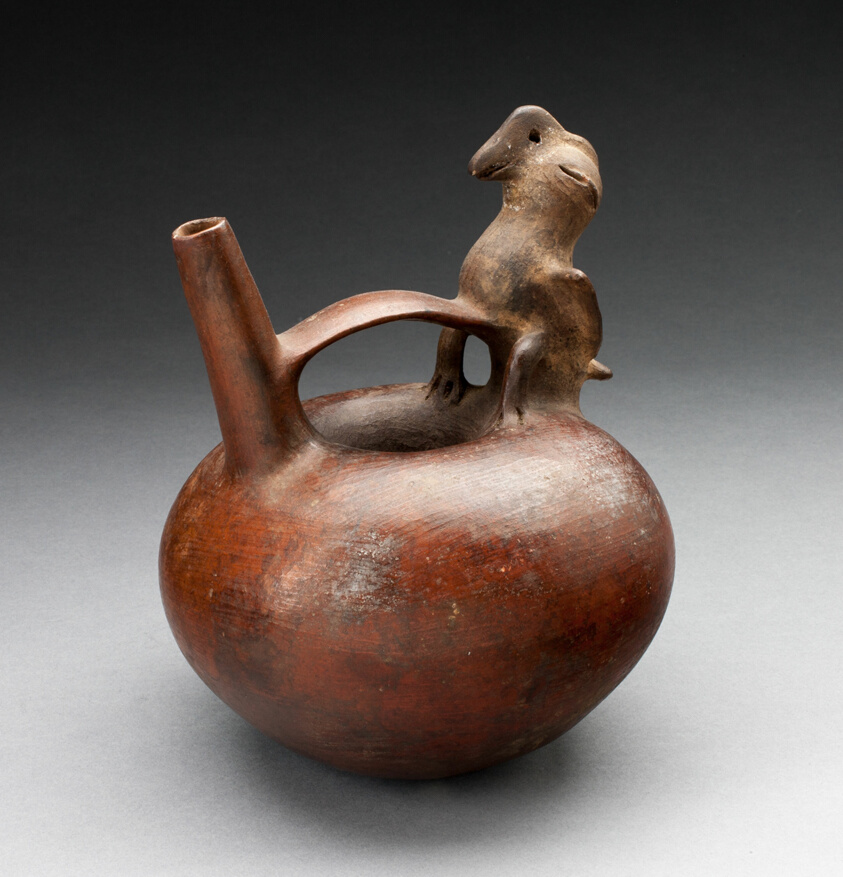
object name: Vessel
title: Single Spout Vessel with Bird Attached to Strap Handle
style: salinar, early intermediate period, Pre-Columbian, americas, Arts of the Americas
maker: Salinar (North coast, Peru)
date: 200 BCE–200 CE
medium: Ceramic and pigment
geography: Northern Peru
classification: earthenware; ceramics; vessel; art of the americas